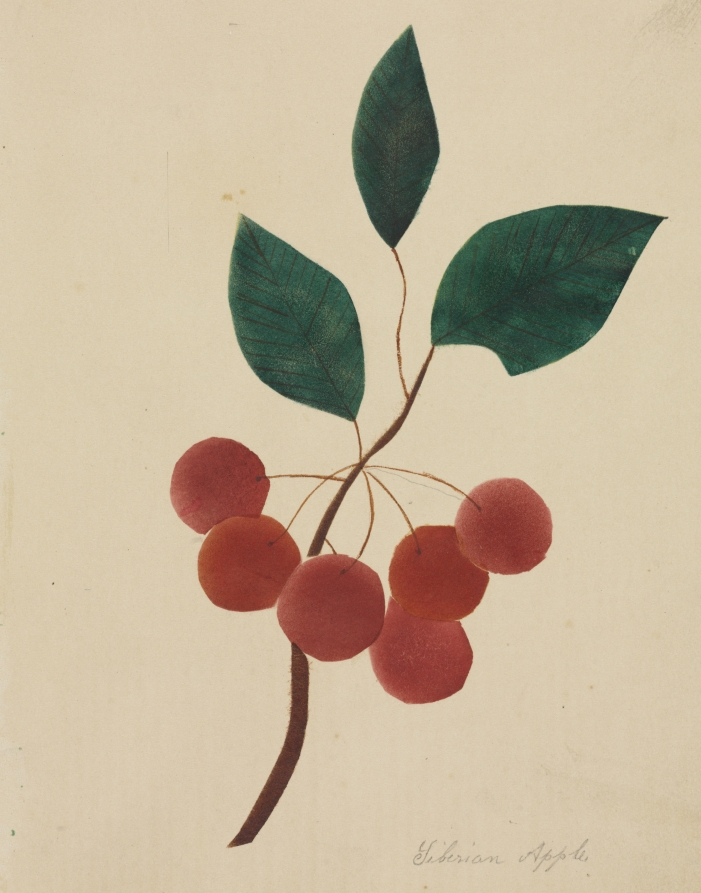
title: Siberian Apple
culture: America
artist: Mary Altha Nims (American, 1817–1907)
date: 1800s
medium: watercolor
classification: Drawing